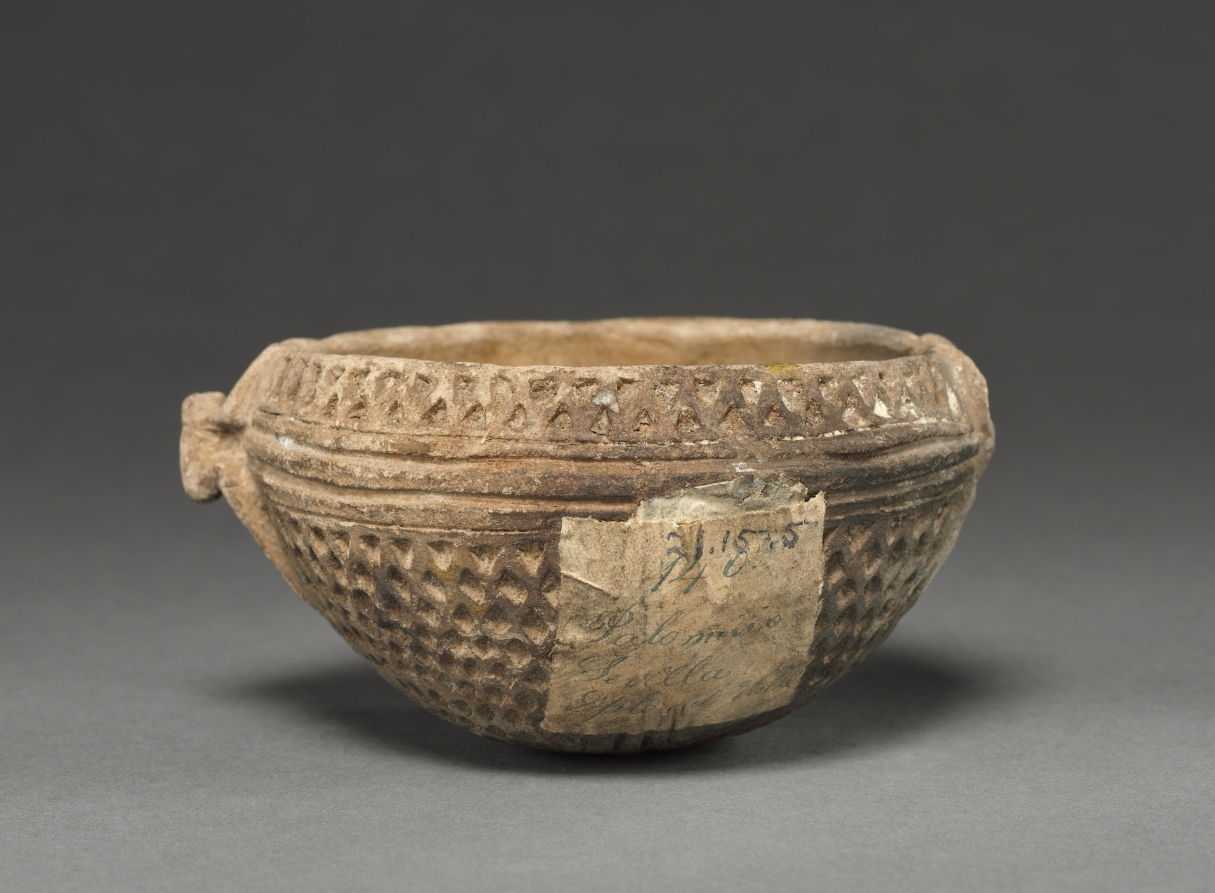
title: Jar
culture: Colombia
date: before 1550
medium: red ware with incised patterns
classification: Ceramic